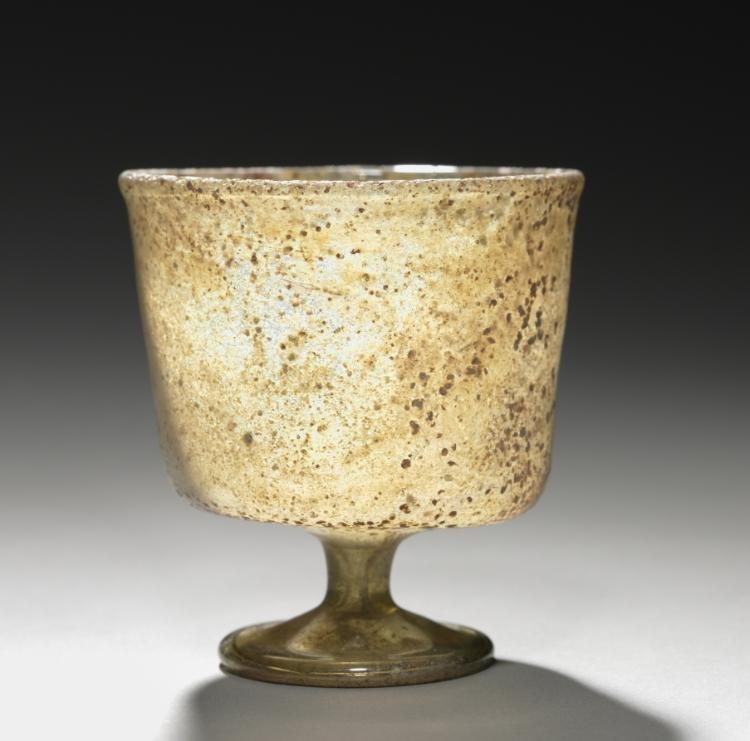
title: Stemmed Cup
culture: Syro-Palestinian, 6th-7th century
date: 500s-600s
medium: glass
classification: Glass